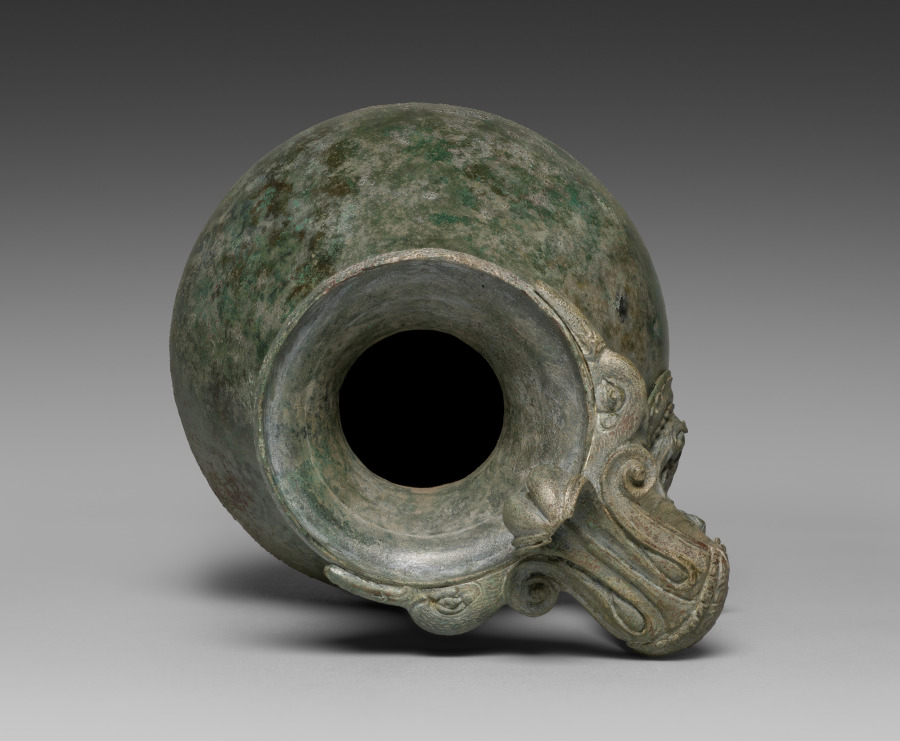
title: Olpe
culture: Italy, Roman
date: 1–100 CE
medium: cast bronze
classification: Metalwork